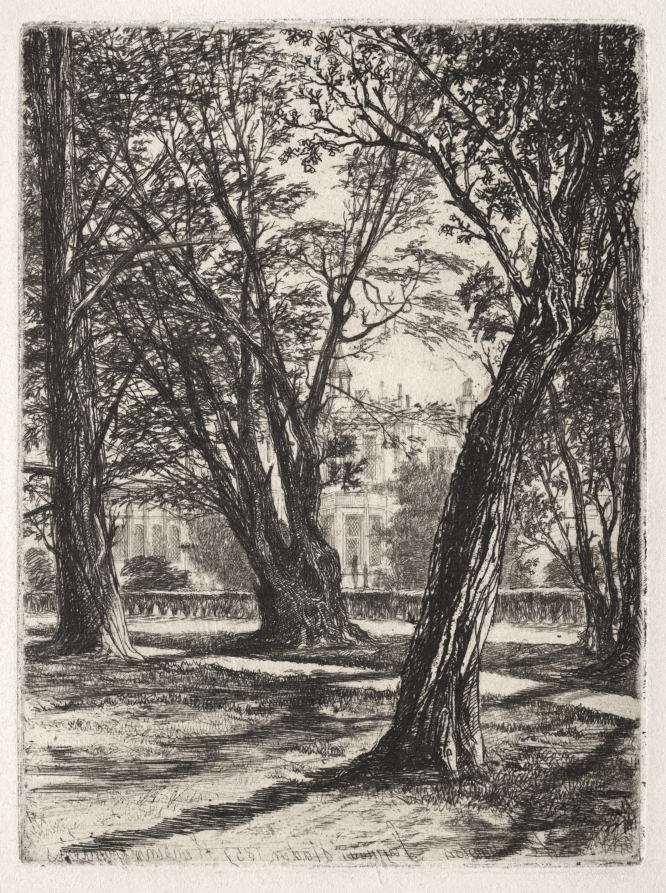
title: Kensington Gardens (The Small Plate)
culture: England, 19th century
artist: Francis Seymour Haden (British, 1818–1910)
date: 1859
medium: etching and drypoint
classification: Print